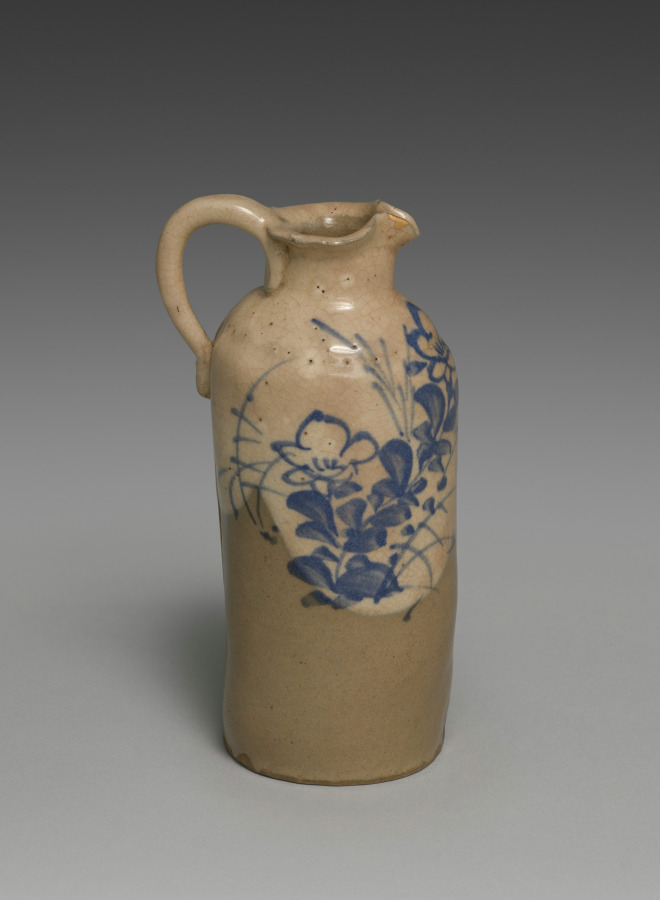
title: Sake Pourer with Bellflowers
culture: Japan, Edo period (1615–1868)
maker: attributed to Seifū Yohei I (Japanese, 1801–1861)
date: c. 1844–57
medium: one of a pair of sake flasks; stoneware with white slip, underglaze blue and gold repair (kintsugi) (Kyoto ware)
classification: Ceramic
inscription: The storage box for the pair of vessels is inscribed and impressed with seals.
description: This pair of sake pourers adorned with with bamboo and bellflowers is attributed to the founder of the Seifū Studio, Seifū Yohei I (1801–1861). Yohei I, the lineage founder, was born to the Yasuda family in the city of Kanazawa, which faces the Sea of Japan. His home province of Kaga (in present-day Ishikawa Prefecture) produced its own ceramics, known as Kutani ware, but for his training as a potter, Yohei I chose Kyoto, which produced the more technically advanced porcelain ware. He moved to Kyoto around the 1820s and became apprenticed to Nin’ami Dohachi, a leading potter in the city. He later struck out on his own, and it is likely that his teacher gave him the name Seifu Yohei. His works include many exquisitely painted copies of Chinese porcelain, and he also produced stoneware with overglaze color enamels that emulated works in the style of Ogata Kenzan (1663–1743) at which his teacher excelled.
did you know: Kintsugi is the Japanese art of repairing broken pottery by mending the areas of breakage with urushi lacquer dusted or mixed with powdered gold.